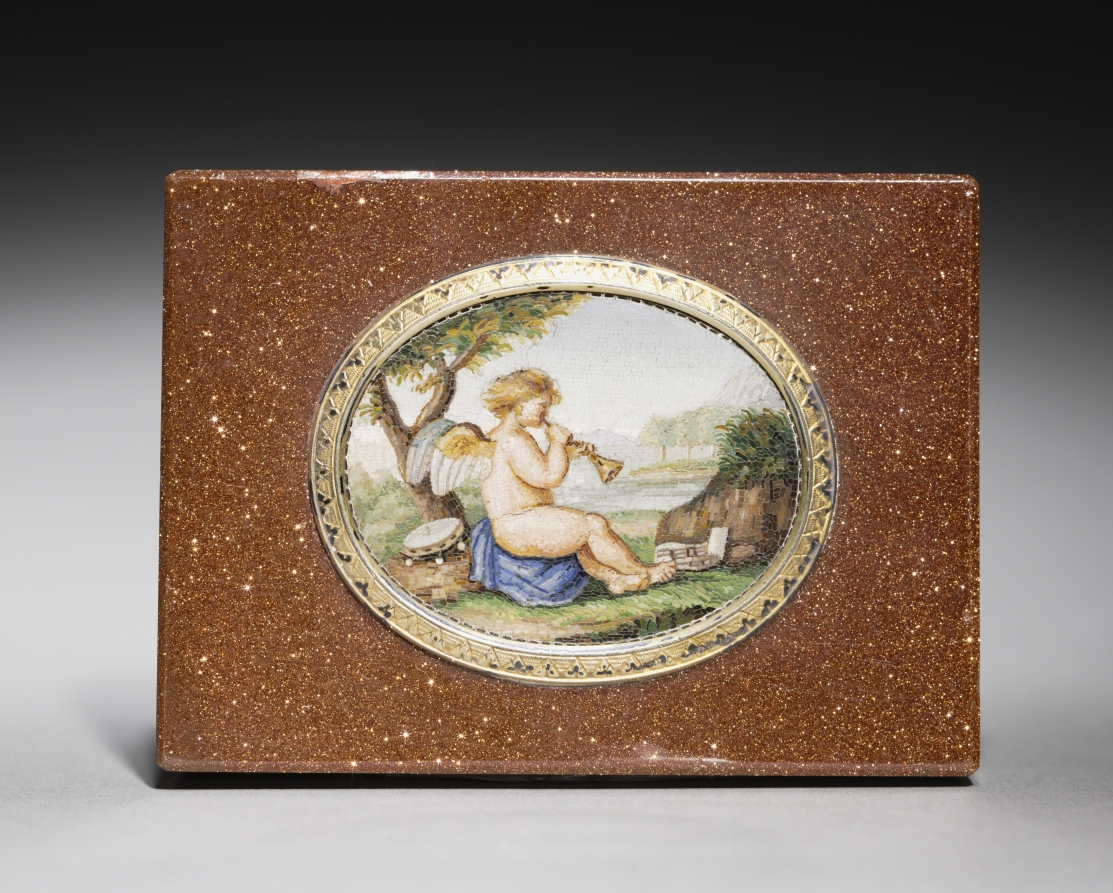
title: Snuff Box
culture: Italy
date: 1860–70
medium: goldstone, gold, micro mosaic glass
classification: Enamel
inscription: no marks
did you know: Hundreds of small glass tesserae make up the central image on the cover of this snuff box.